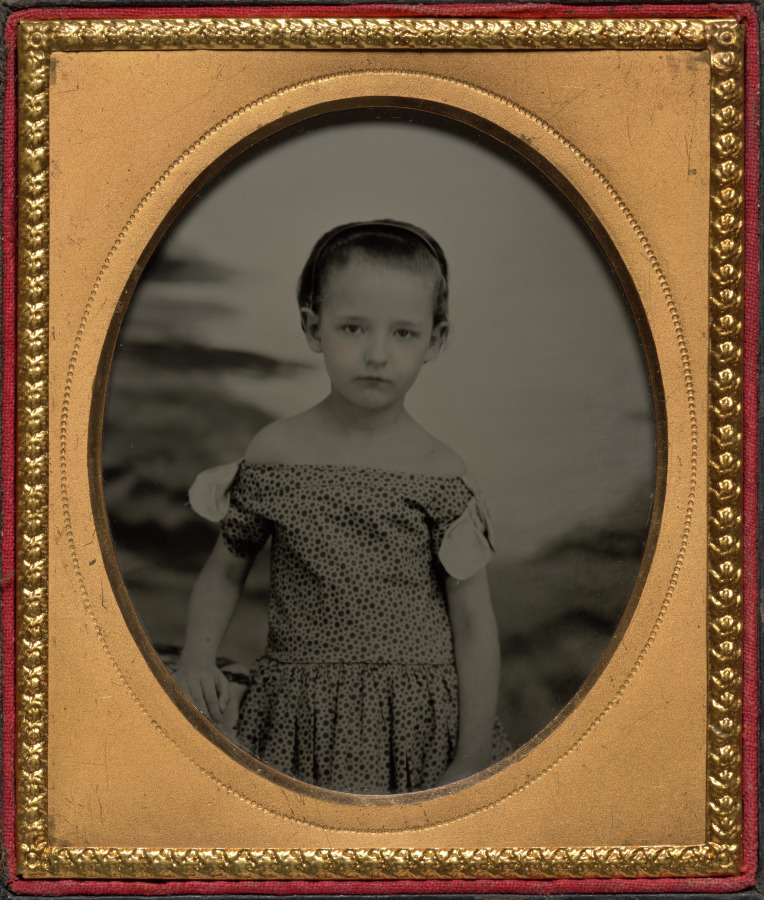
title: Child in off-shoulder polka dot dress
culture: America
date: c. 1860–65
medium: ambrotype, sixth plate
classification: Photograph